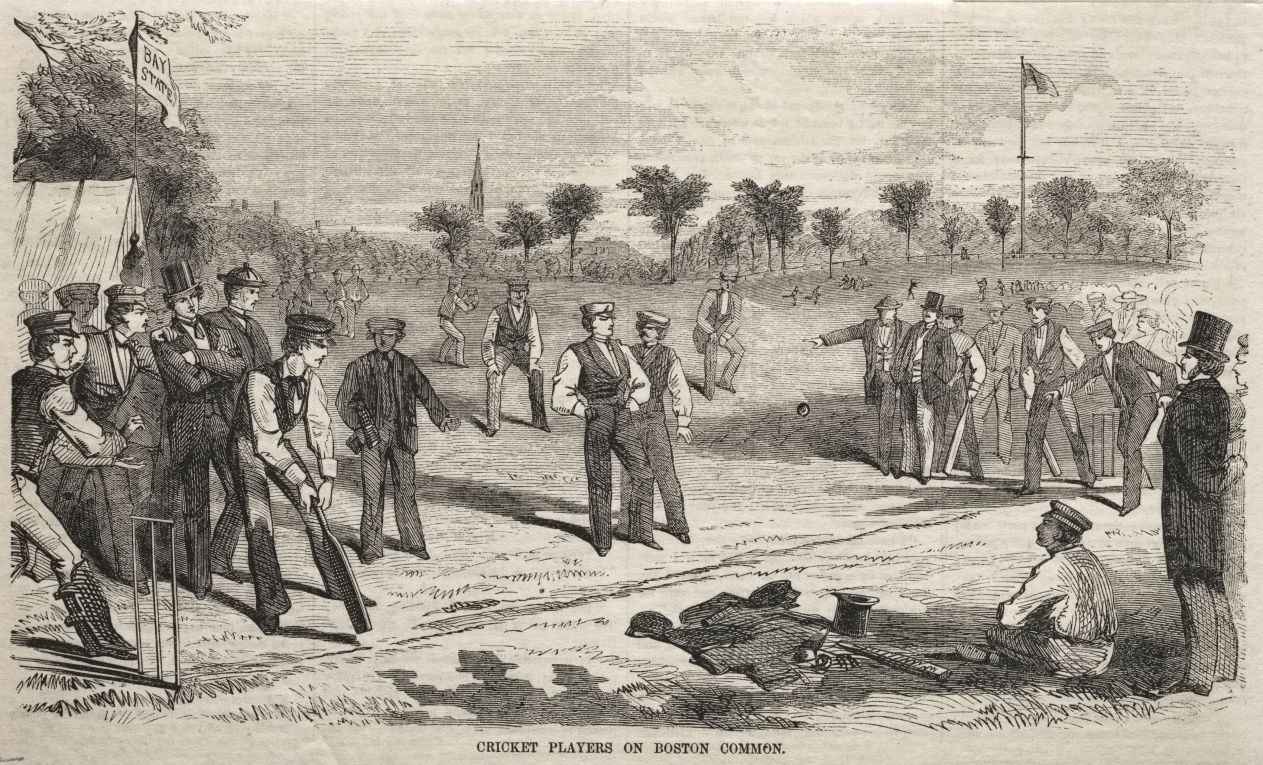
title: Cricket Players on Boston Common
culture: America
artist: Winslow Homer (American, 1836–1910)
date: 1859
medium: wood engraving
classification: Print